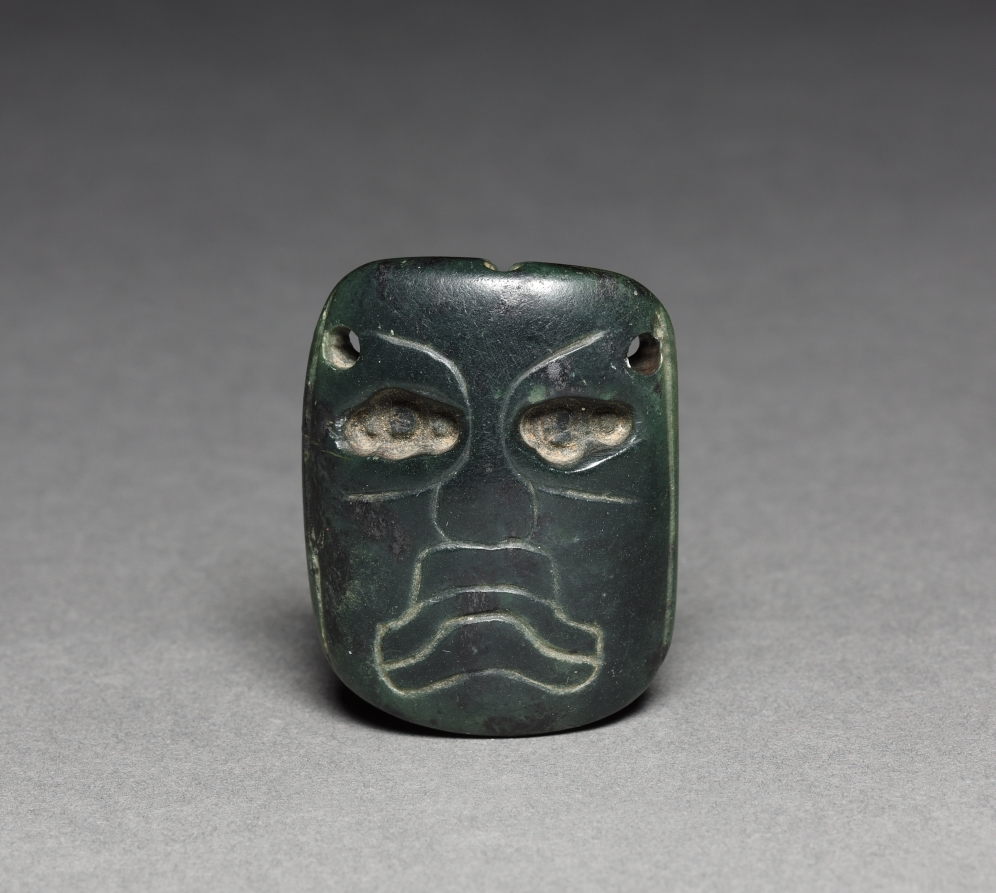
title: Mask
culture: Mesoamerica, Mexico, Olmec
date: 1200–300 BCE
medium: jade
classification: Jade